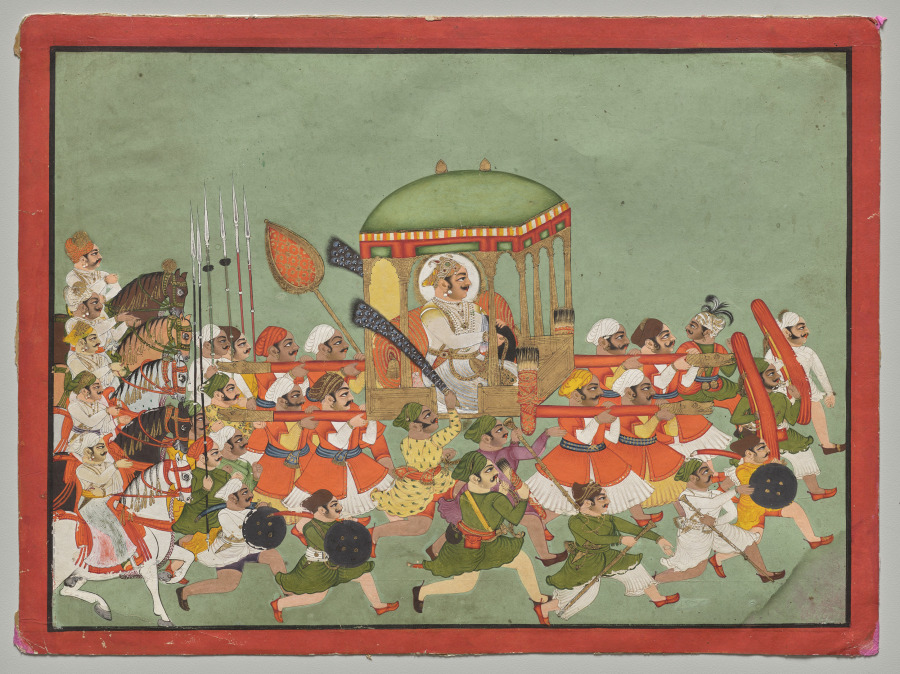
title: Maharao Chattar Sal (reigned 1758–64) of Kota in a Palanquin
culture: Northwestern India, Rajasthan, Kota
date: c. 1760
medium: Gum tempera and gold on paper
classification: Painting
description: The king sits in his litter with a sun and moon disk behind his head, emphasizing the light of divine sanction for his rule. His power and grandeur seem to inspire his attendants to stride with effortless enthusiasm. Symbols of royalty abound in his retinue: cavaliers on horseback, spear bearers, soldiers with swords and daggers, attendants with peacock-feather fans, and archers carrying bows draped in red and quivers full of arrows. The small kingdom of Kota achieved independence in 1624, and its rulers, called rao (king) or maharao (great king) in the local dialect of Rajasthani, supported an atelier of artists at their court. Kota artists were known for dynamic and idealized portrayals of their rulers engaged in activities that emphasized the king’s supreme status.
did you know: Quivers of arrows are tied to the front corners of the palanquin.